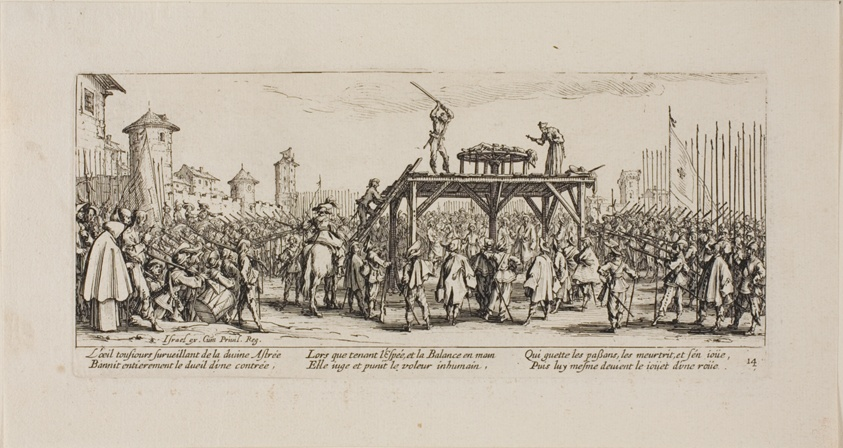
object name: Print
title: The Wheel, plate fourteen from The Miseries of War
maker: Jacques Callot (French, 1592-1635); published by Israël Henriet (French, 1590-1661)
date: 1633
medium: Etching on paper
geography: France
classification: etching; print; prints and drawing